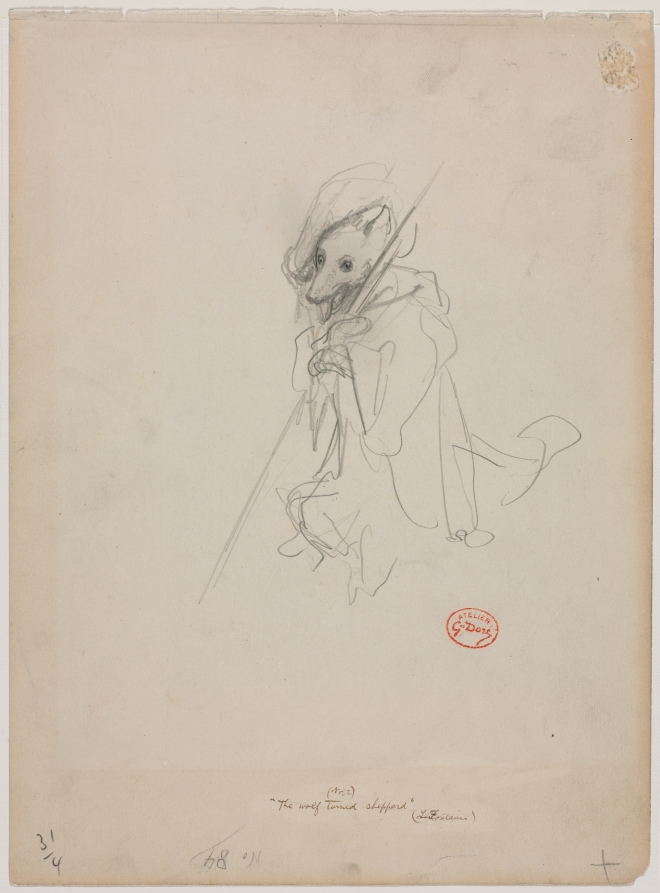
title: Sketch for "The Wolf Turned Shepherd" (recto)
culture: France, 19th century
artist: Gustave Doré (French, 1832–1883)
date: c. 1868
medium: graphite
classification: Drawing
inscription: lower left, in graphite: 31/4 ; lower center, in brown ink: (No. 2) / "The wolf turned sheppard" / (LaFontaine) ; lower center, in graphite: No 84 [upside down] [84 underlined] ; lower right, in graphite: X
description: “The Wolf Turned Shepherd” is a fable in which a disguised wolf approaches a flock of sheep while their shepherd sleeps. The wolf is ultimately discovered while impersonating the shepherd, waking the flock’s caretaker with its howl. Gustave Doré’s early sketch focuses on the wolf’s piercing gaze, highlighting his cleverness and overconfidence. Doré was among the most successful and versatile illustrators of the mid-1800s, and his illustrations for The Fables of La Fontaine—to which the final version of this drawing belongs—contributed to his fame. First published in France in 1867, the book was soon reissued in other countries.